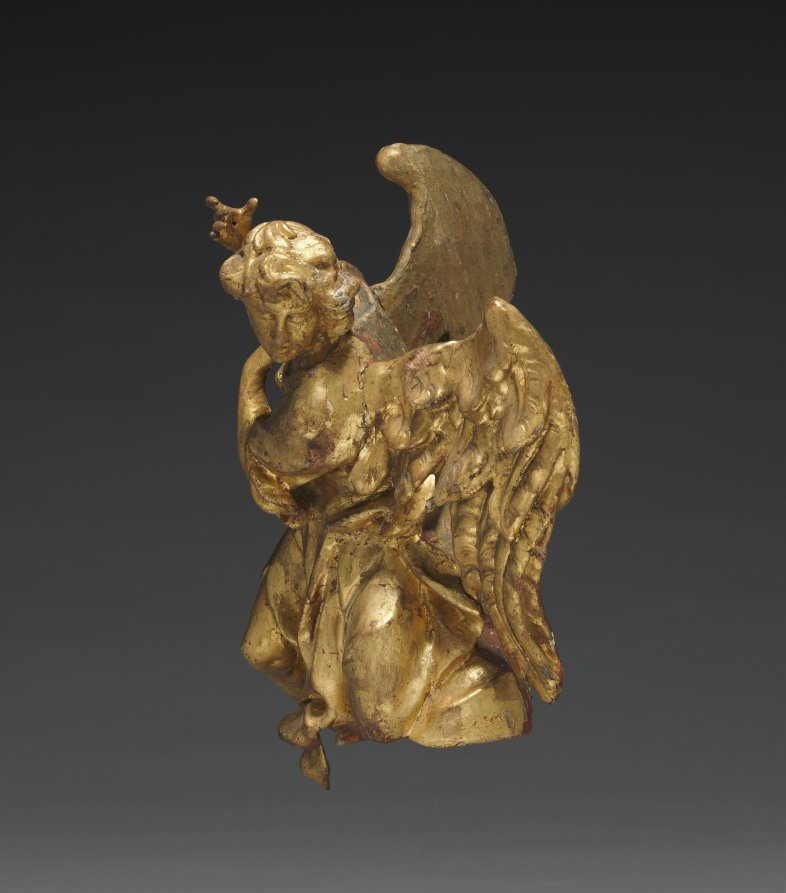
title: Altarpiece with Relics - Angel, lower left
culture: Germany, Bavaria, 18th century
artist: Joseph Matthias Götz (German, 1696–1760)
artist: and Workshop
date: c. 1735–40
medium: gilded wood, with relics in niches: gilded wood, mother-of-pearl, ebony, red silk, gold wire, seed pearls, rock crystal, pen and ink on paper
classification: Sculpture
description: Götz covers every surface in gold leaf, giving each part of the object equal importance, rather than simply framing a central picture. In this distinctively Central European approach, figural narrative is subordinate to the overall ensemble. Götz designed this object to rest on top of an altar, probably in front of a larger painted or sculpted decorative scheme. The work contains relics seen through the small windows on the perimeter. These small remains of holy figures demonstrate the persistence of a medieval Catholic tradition well into the 1700s.